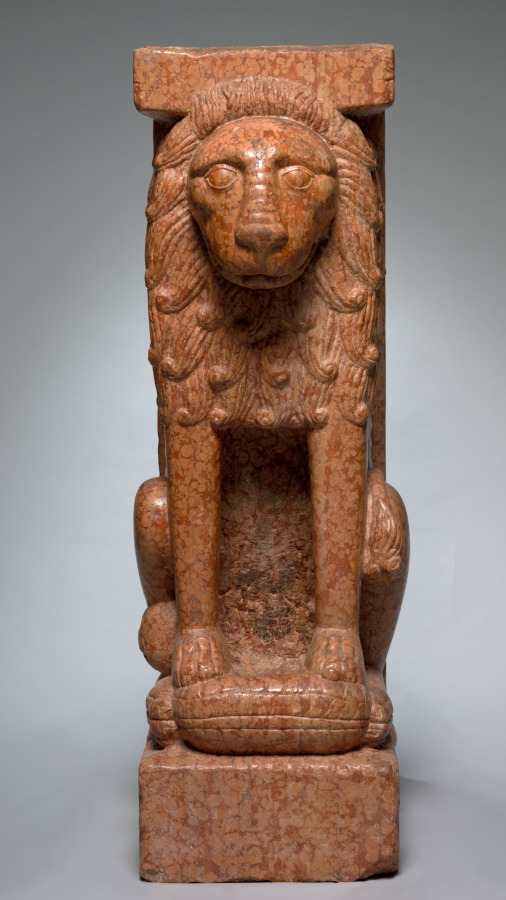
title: Supporting Lion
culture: Italy, style of the 13th century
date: style of the 1200s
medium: pink limestone (known as "Verona Marble")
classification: Sculpture